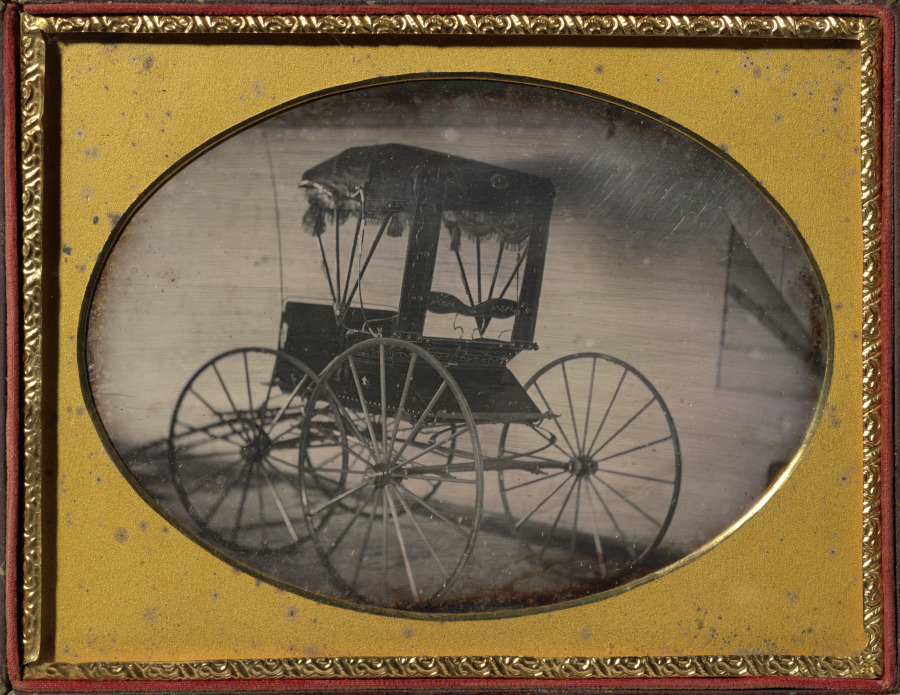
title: Buggy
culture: America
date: c. 1853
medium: daguerreotype, half-plate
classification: Photograph